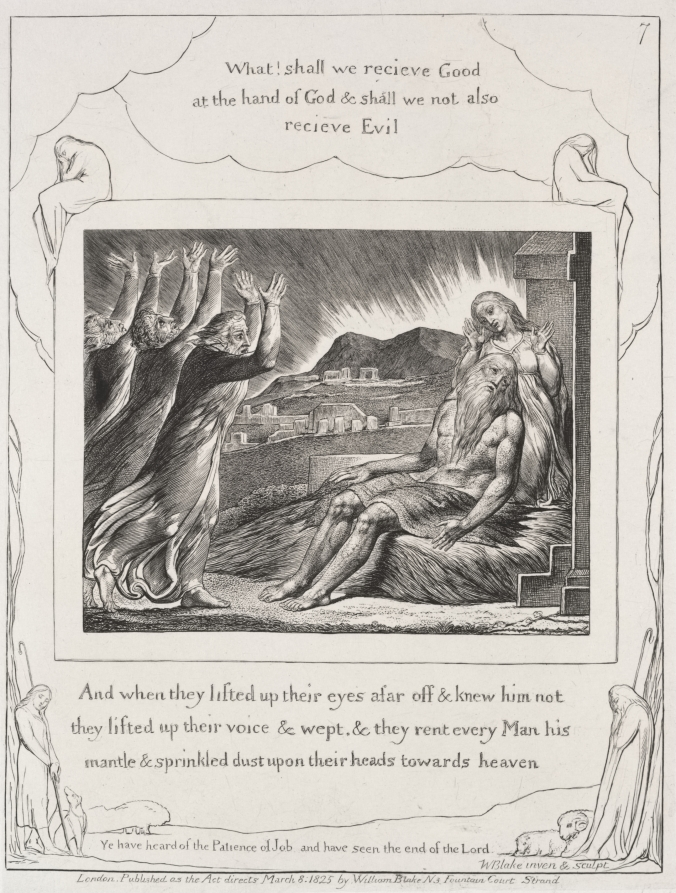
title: The Book of Job: Pl. 7, And when they had lifted up their eyes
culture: England, 19th century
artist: William Blake (British, 1757–1827)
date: 1825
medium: engraving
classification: Print